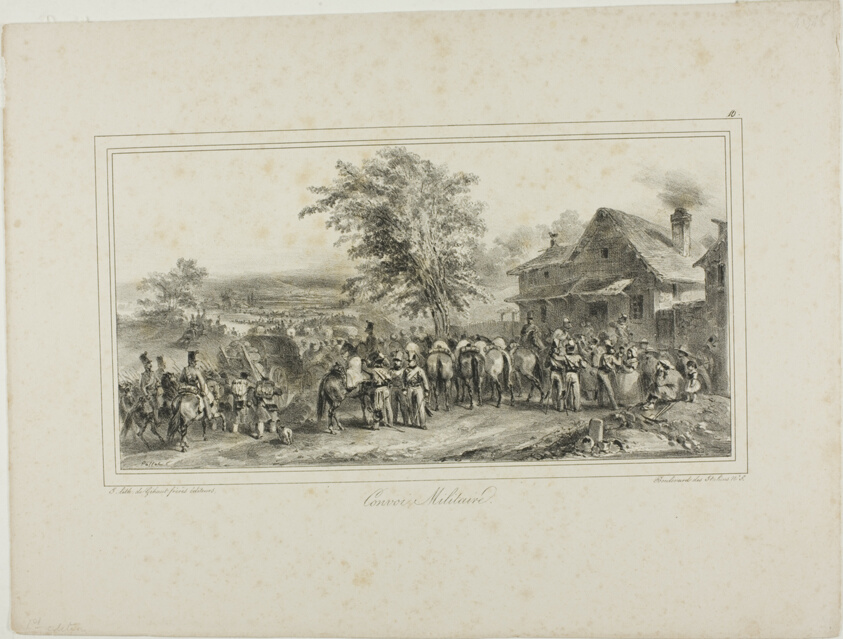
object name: Print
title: Military Convoy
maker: Denis Auguste Marie Raffet (French, 1804-1860); published by Chez Gihaut Frères (French, 19th century)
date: 1831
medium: Lithograph in black on ivory wove paper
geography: France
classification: lithograph; print; prints and drawing